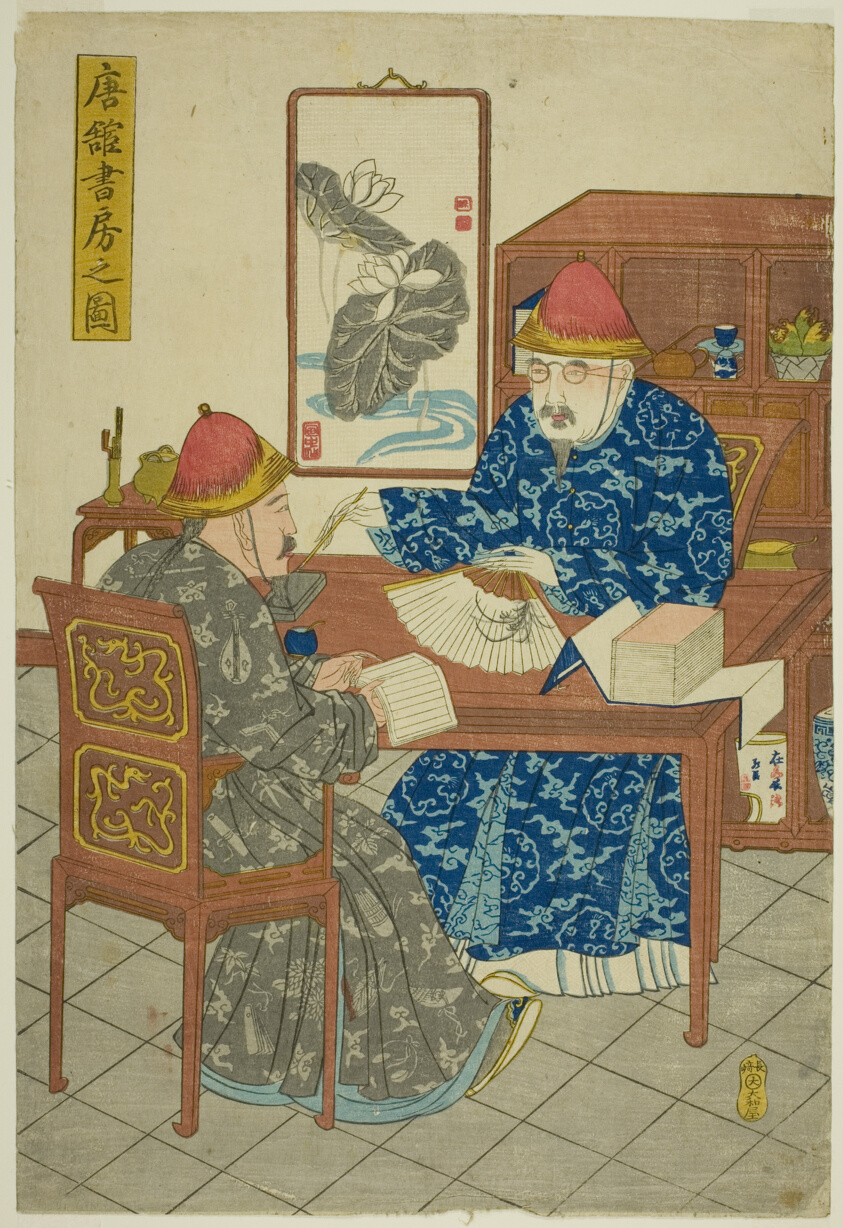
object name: Print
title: Library of a Chinese Residence (Tokan shobo no zu)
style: Japanese (culture or style)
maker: Artist unknown; Japanese, c. 1800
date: c. 1800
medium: Color woodblock print; oban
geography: Japan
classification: woodblock print; print; asian art